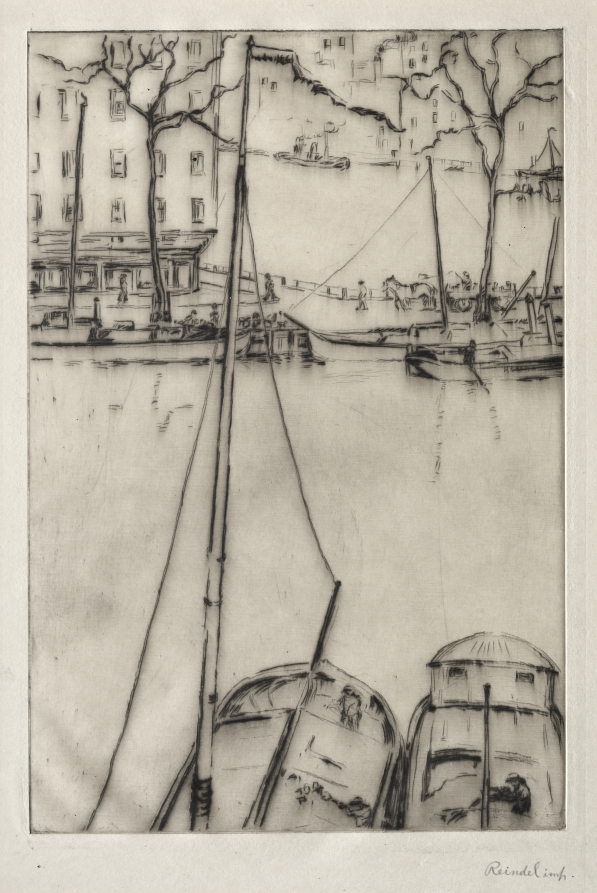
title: View in Rotterdam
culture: America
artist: William George Reindel (American, 1871–1948)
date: c. 1923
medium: drypoint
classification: Print